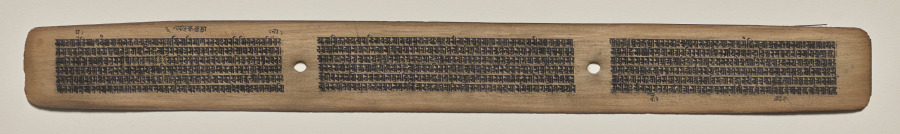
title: Text, Folio 57 (recto), from a Manuscript of the Perfection of Wisdom in Eight Thousand Lines (Ashtasahasrika Prajnaparamita-sutra)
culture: Eastern India, Bihar, Vikramashila Monastery. Painting: Nepal, Kathmandu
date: Sunday, September 14, 1119 (year 239 of the Newar Samvat in the month of Ashvina)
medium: gum tempera and ink on palm leaves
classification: Painting